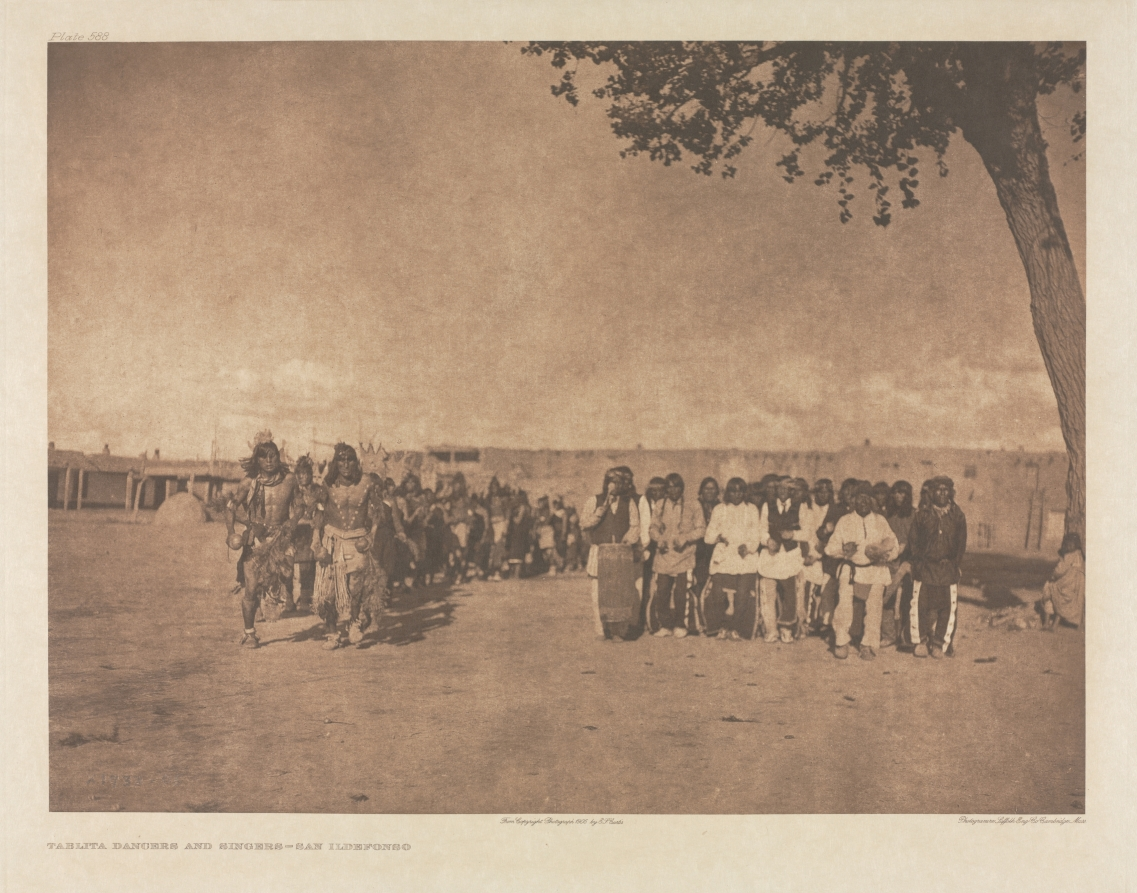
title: Portfolio XVII, Plate 588: Tablita Dancers and Singers - San Ildefonso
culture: America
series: The North American Indian: being a series of Portfolios picturing and describing the Indians of the United States, the Dominion of Canada, and Alaska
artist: Edward S. Curtis (American, 1868–1952)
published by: The University Press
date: 1905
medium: photogravure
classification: Portfolio